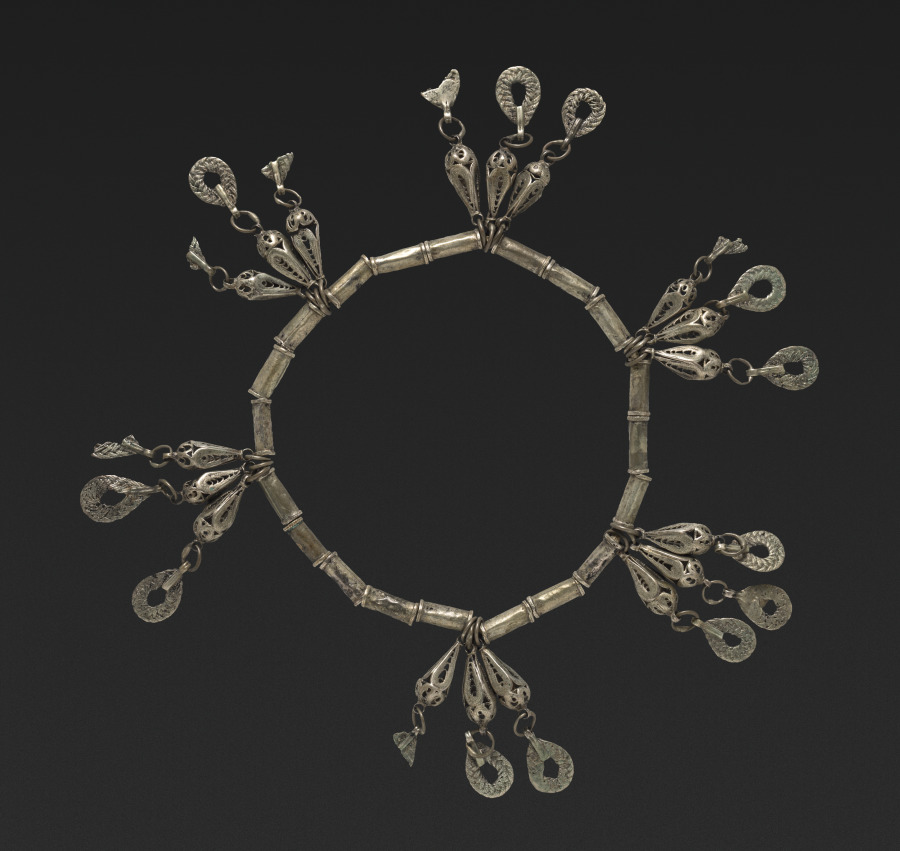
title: Necklace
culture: Balkans, 19th century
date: 19th century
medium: silver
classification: Jewelry